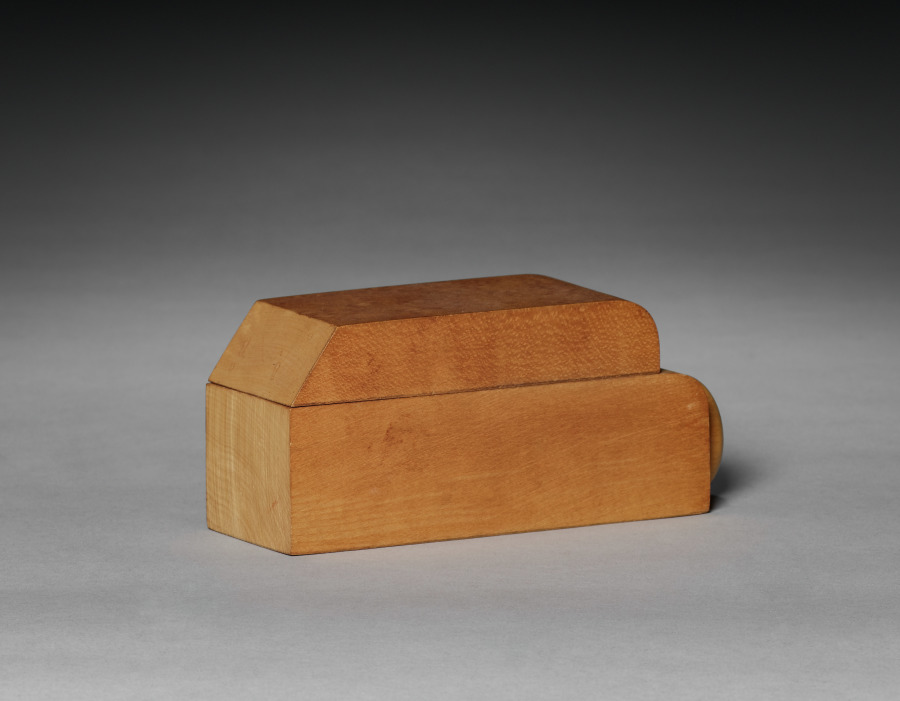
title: Boysen Toys (car)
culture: Denmark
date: 1900s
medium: Wood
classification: Wood